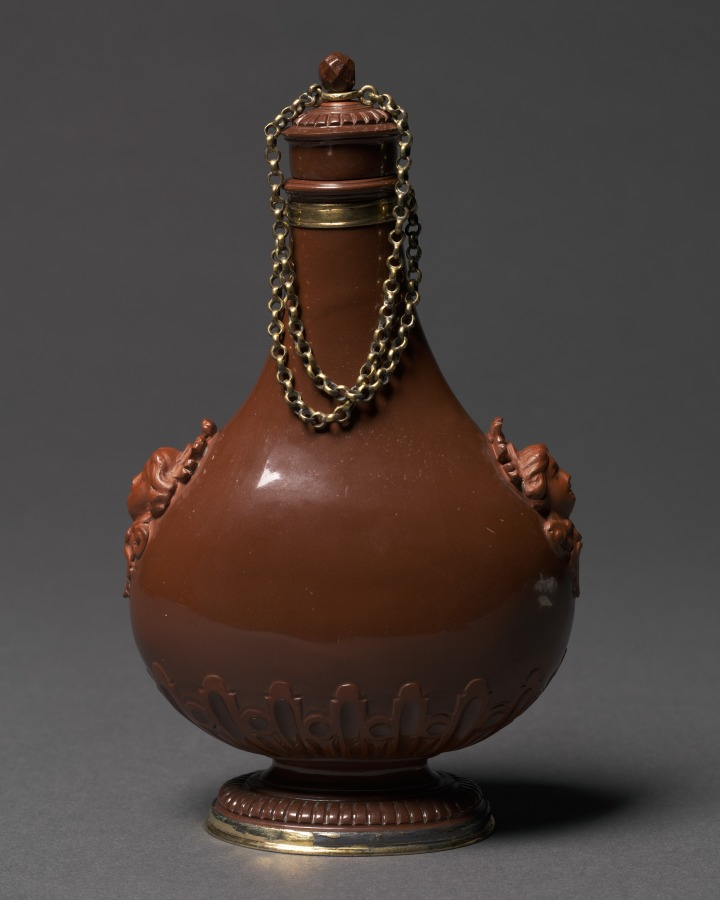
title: Pilgrim Bottle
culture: Germany, Meissen, 18th century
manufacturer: Meissen Porcelain Factory (German, est. c. 1710)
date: c. 1715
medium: polished red stoneware, silver-gilt mounts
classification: Ceramic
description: Throughout the early 1700s porcelain was imported to Europe from China and Japan, until the correct formula to produce it was developed by Johann Friedrich Böttger and a collaborator, which led to the establishment of the Meissen factory in 1710. Red stoneware inspired by Chinese Yixing ware and white porcelain were produced in Meissen under Böttger. Its fine red stoneware was so hard that it could be polished on a lapidary’s wheel—as was the body of this bottle.